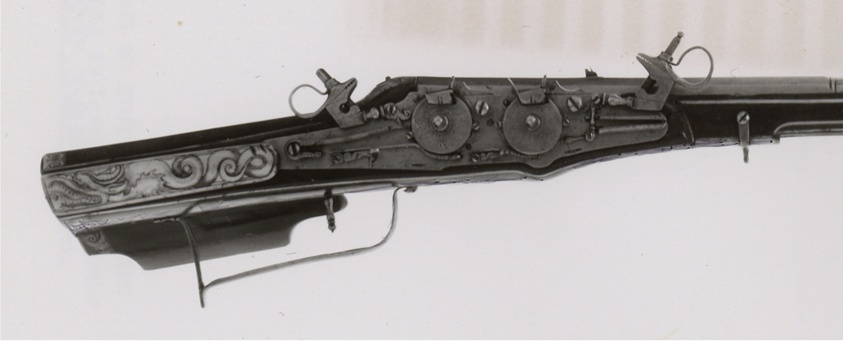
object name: Arms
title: Two-Shot, Superimposed-Charge, Double Wheel-Lock Rifle and Spring Gun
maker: Southern German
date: 1594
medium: Steel, iron, copper, wood, and ivory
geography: Southern Germany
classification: firearm-long gun; arms; arms and armor